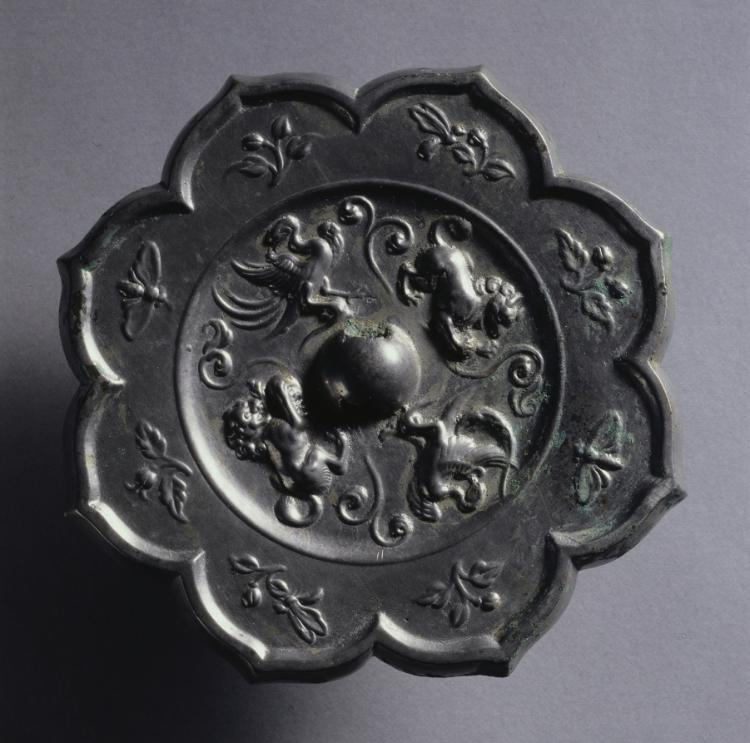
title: Octafoil Mirror with Paired Phoenixes and Animals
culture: China, Tang dynasty (618-907)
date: late 600s-early 700s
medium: bronze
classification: Metalwork